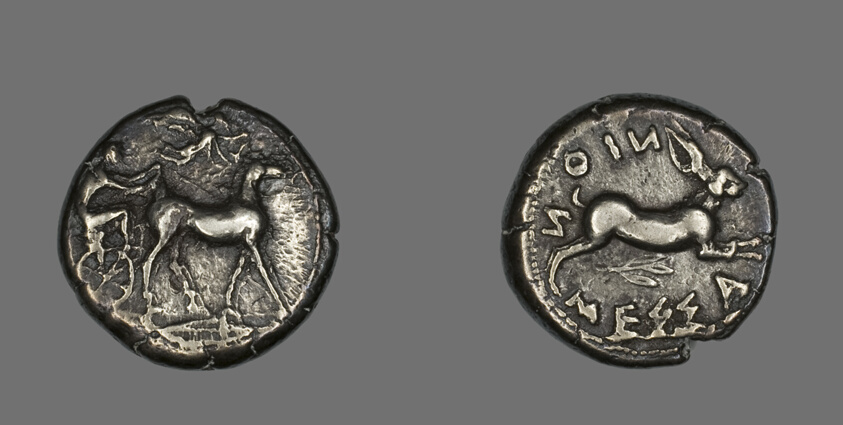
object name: Coin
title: Tetradrachm (Coin) Depicting a Biga of Mules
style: greek, ancient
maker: Greek; Messina, Sicily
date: 476-396 BCE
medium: Silver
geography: Messina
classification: coin; ancient art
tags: donkeys, hares, Chariots